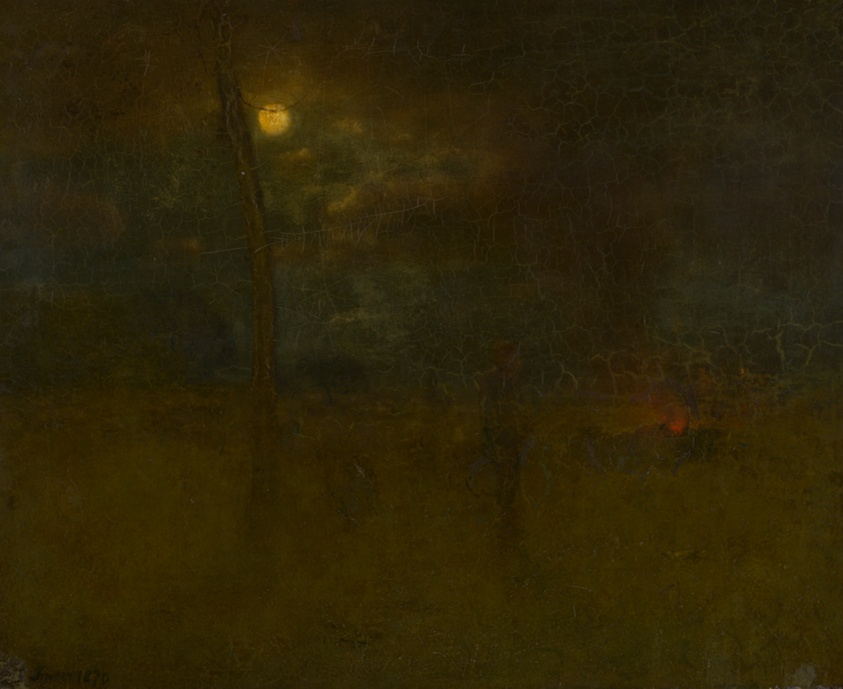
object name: Painting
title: The Moon at Night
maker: George Inness (American, 1825–1894)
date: 1890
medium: Oil on canvas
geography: United States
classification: painting; american arts